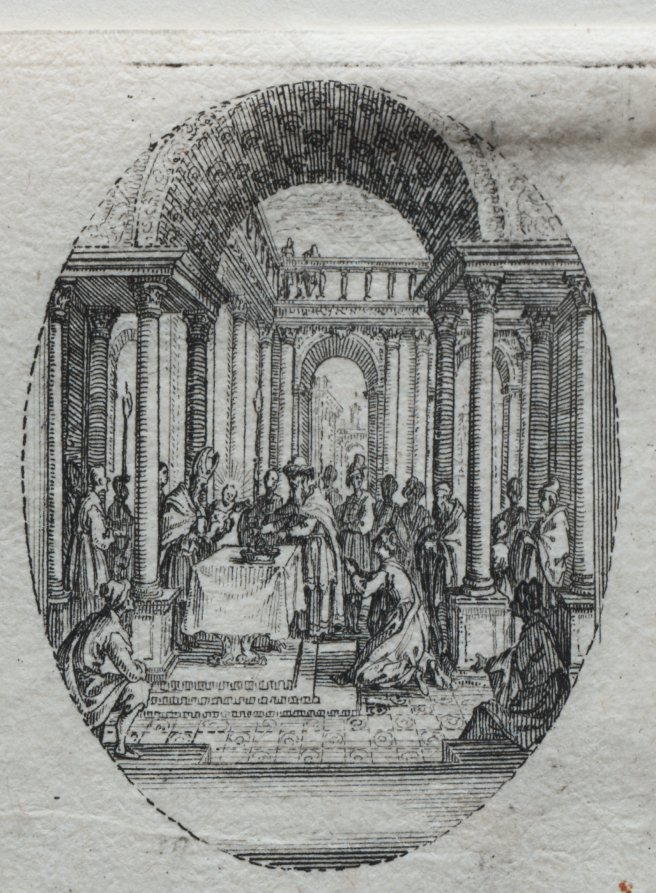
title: The Mysteries of the Passion: The Presentation in the Temple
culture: France, 17th century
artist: Jacques Callot (French, 1592–1635)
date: 1631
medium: etching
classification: Print